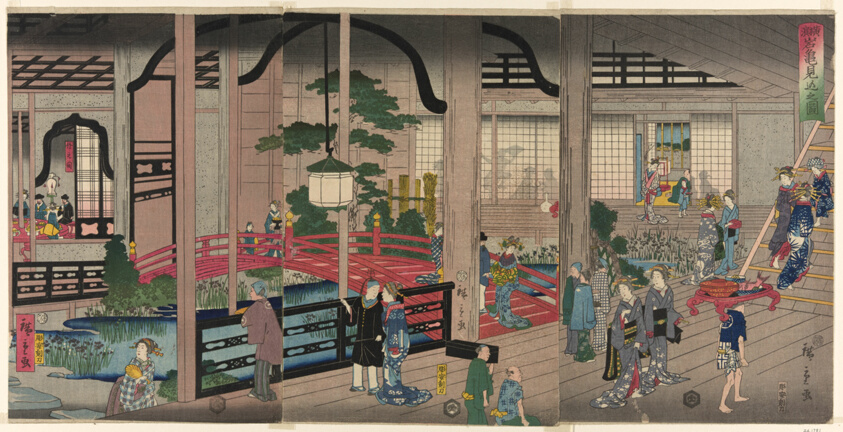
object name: Print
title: The Interior of the Gankiro in Yokohama (Yokohama Gankiro mikomi no zu)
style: Japanese (culture or style)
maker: Utagawa Hiroshige II (Shigenobu) (Japanese, 1826-1869)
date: 1860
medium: Color woodblock print; oban triptych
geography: Japan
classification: woodblock print; print; asian art